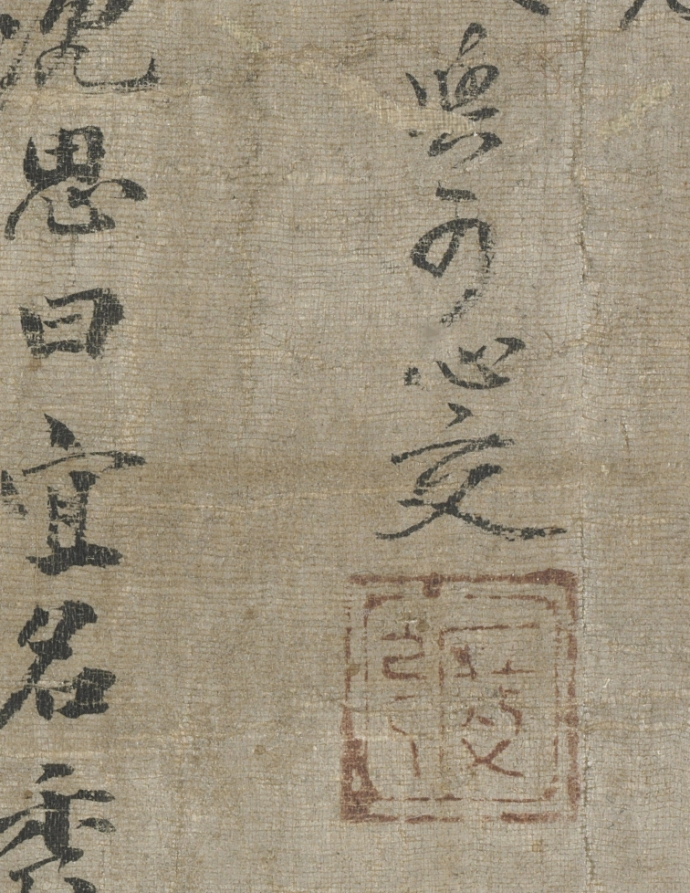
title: Landscape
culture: Japan, Edo period (1615–1868)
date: 1700s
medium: hanging scroll; ink and color on silk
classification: Painting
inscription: four inscriptions (one dated to 1414) by Japanese monks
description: This composition was fashioned after works created by Zen clerics of the Muromachi period (1392–1573), who often added their original Chinese-style poems above an ink painting to make a hanging scroll called a shigajiku. The poems here quote from essays on Sima Guang (1019–1086) by the Chinese Song dynasty literatus Su Shi (1037–1101). They interpret the studio surrounded with bamboo as a metaphor for the garden of Sima, the Song dynasty scholar-official who, in imitation of the Tang poet Bai Juyi, enjoyed the garden in isolation during his exile in Luoyang.